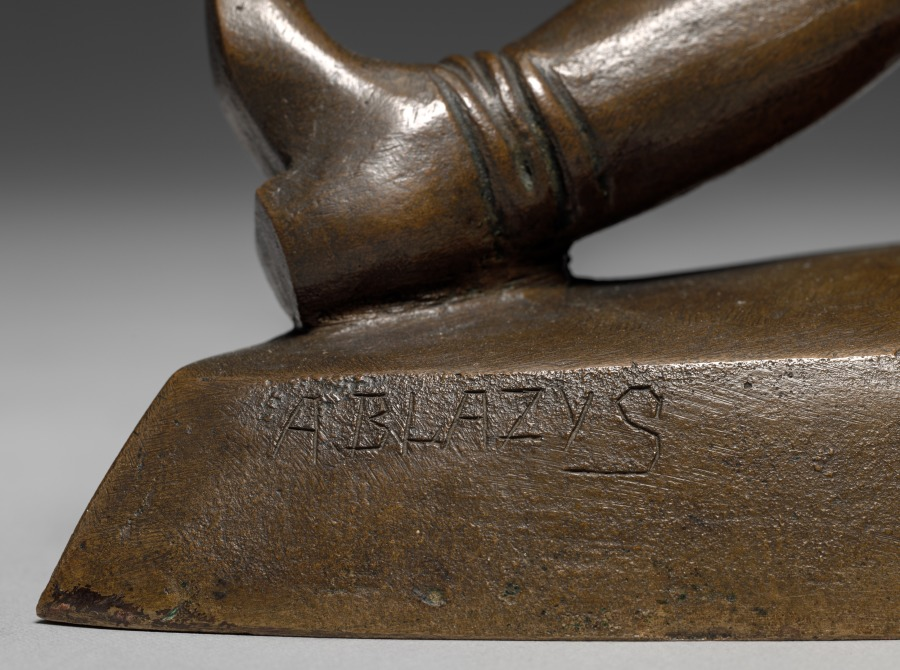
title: Balalaika Player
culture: America, Ohio, Cleveland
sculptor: Alexander Blazys (American, born Russian Empire [now Lithuania], 1894–1963)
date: 1925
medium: bronze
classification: Sculpture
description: A Lithuanian immigrant, Blazys introduced modernist sculpture to Cleveland upon his arrival in 1925. These figures merge rhythmic movement inspired by music with faceted, geometric planes derived from Cubism.